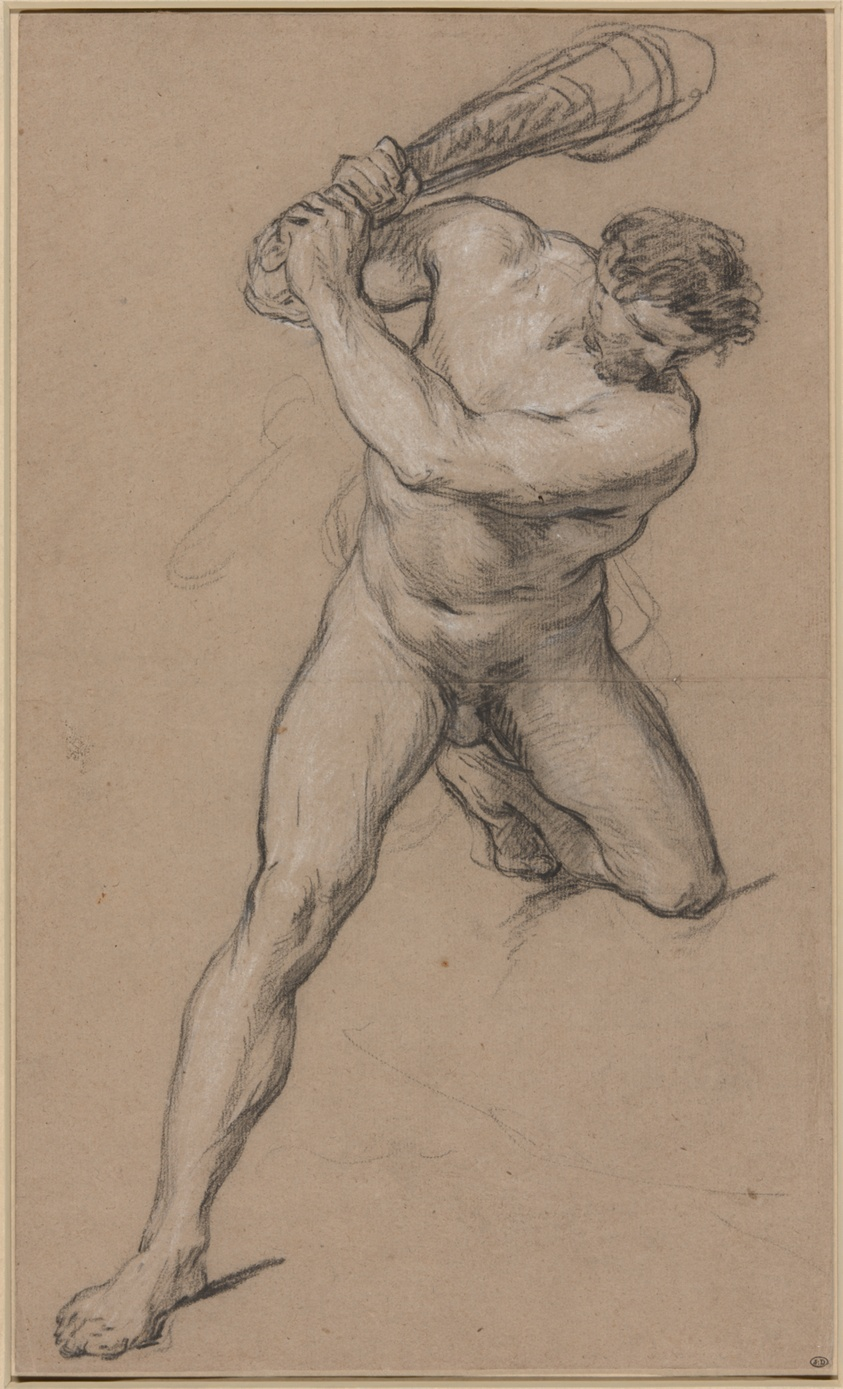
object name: Drawing and Watercolor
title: Hercules Raising his Club: Study for “Hercules and Cacus”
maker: François Lemoyne; French, 1688–1737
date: 1717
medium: Black chalk, with white chalk, on buff laid paper, laid down on laid paper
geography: France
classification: drawings (visual works); chalk; paper; prints and drawing